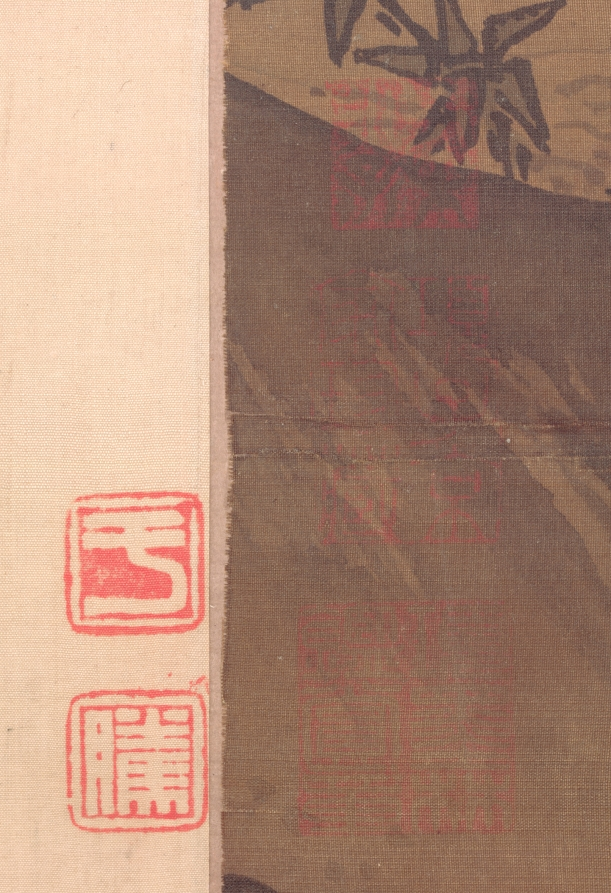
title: Bamboo and Ducks by a Rushing Stream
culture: China, Southern Song dynasty (1127–1279)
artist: Ma Yuan (Chinese, c. 1150–after 1255)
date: 1127–1279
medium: hanging scroll; ink and light color on silk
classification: Painting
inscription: 馬遠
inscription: 12 additional seals: 1 of An Kuo (1481–1534); 7 of Hsiang Yüan-pien (1525–1590); 2 of Liang Ch'ing-piao (1620–1691); 2 unidentified. (WKH)